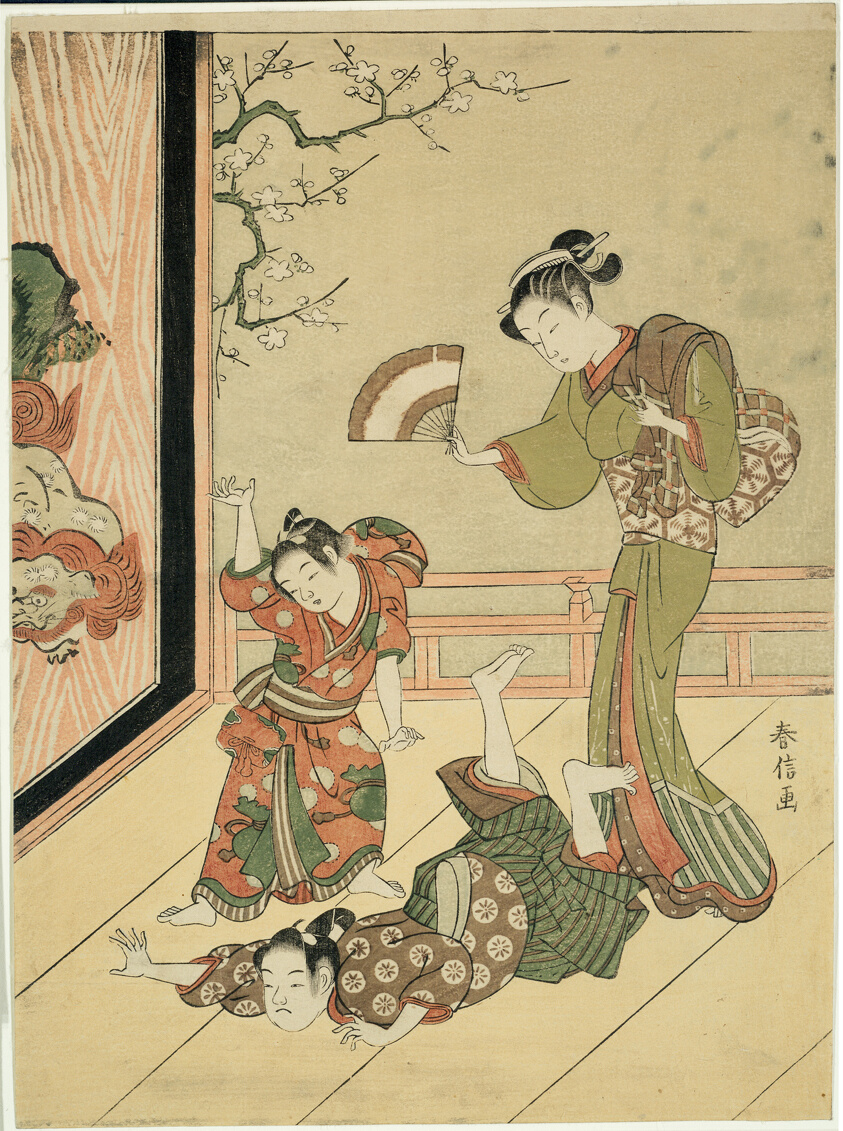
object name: Print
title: The Wrestling Match (parody of Ushikawamaru and Benkei)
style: Japanese (culture or style)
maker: Suzuki Harunobu 鈴木 春信; Japanese, 1725 (?)-1770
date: c. 1767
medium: Color woodblock print; chuban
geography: Japan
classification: woodblock print; print; asian art